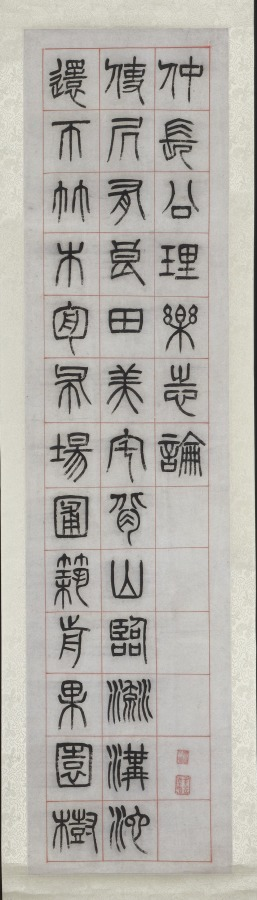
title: On Happiness, Calligraphy in Seal Script Style (zhuanshu)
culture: China, Changsu, Qing dynasty (1644-1911)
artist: Yang Yisun (Chinese, 1813–1881)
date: 1871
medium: hanging scrolls, ink on paper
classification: Painting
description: Yang Yisun transcribed this ancient text on six narrow scrolls, starting at the top right and ending at the bottom left. Yang emphasizes the text’s historic nature by using the seal script style found on stone steles and bronze vessels. On Happiness features reflections of a scholar on a leisurely life in the countryside, composed by Han dynasty official Zhongchang Tong, who died the year the Han dynasty collapsed (AD 220). The idyllic life described in the text may be an evocation of the past in a time of national crisis. A decade before Yang wrote these scrolls, Anglo-French forces had looted and burned the Summer Palace in Beijing. At the same time, the domestic Taiping rebellion (1850–64), led by a religious fanatic to overthrow the Qing government, had devastated Yang’s homeland, the Jiangnan region, with an estimated 20 million lives lost.